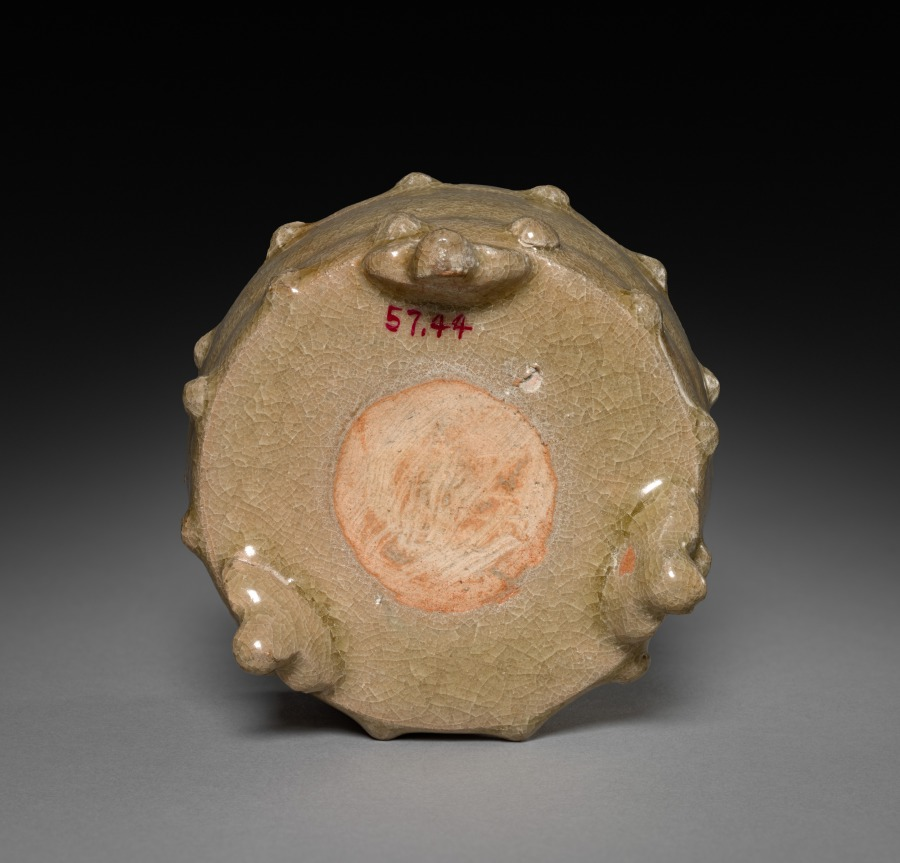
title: Incense Burner: Southern Celadon Ware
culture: China, Yuan dynasty (1271-1368)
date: 1271–1368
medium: glazed buff stoneware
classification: Ceramic